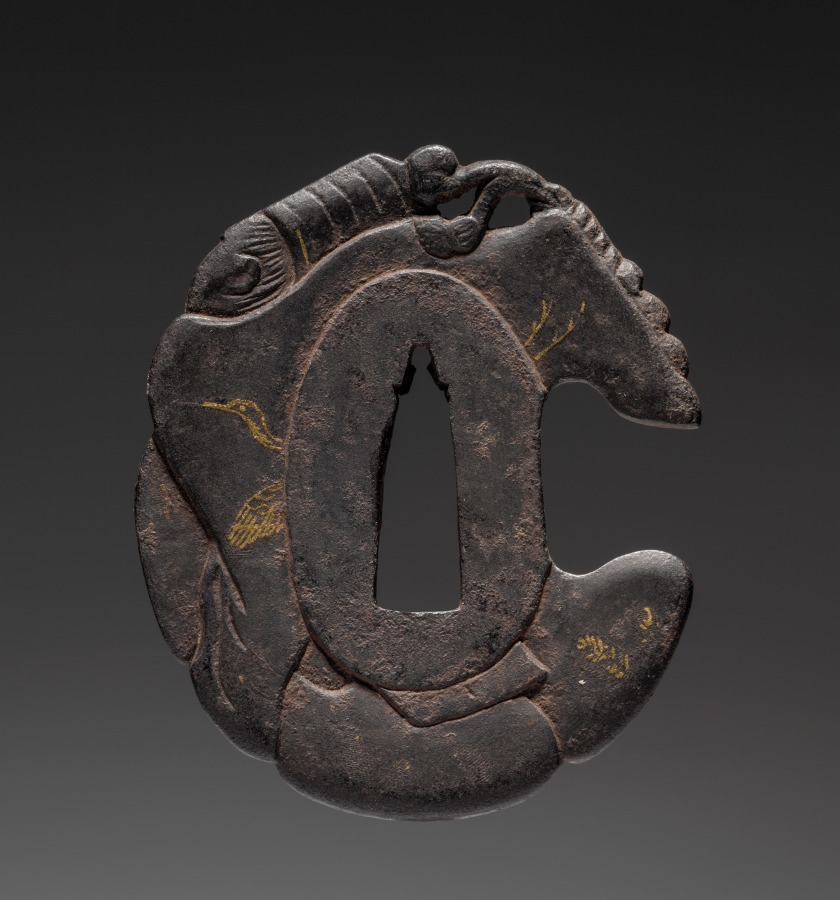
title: Sword Guard (Tsuba)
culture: Japan, possibly Edo period (1615-1868)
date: c. 1615–1868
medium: iron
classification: Arms and Armor